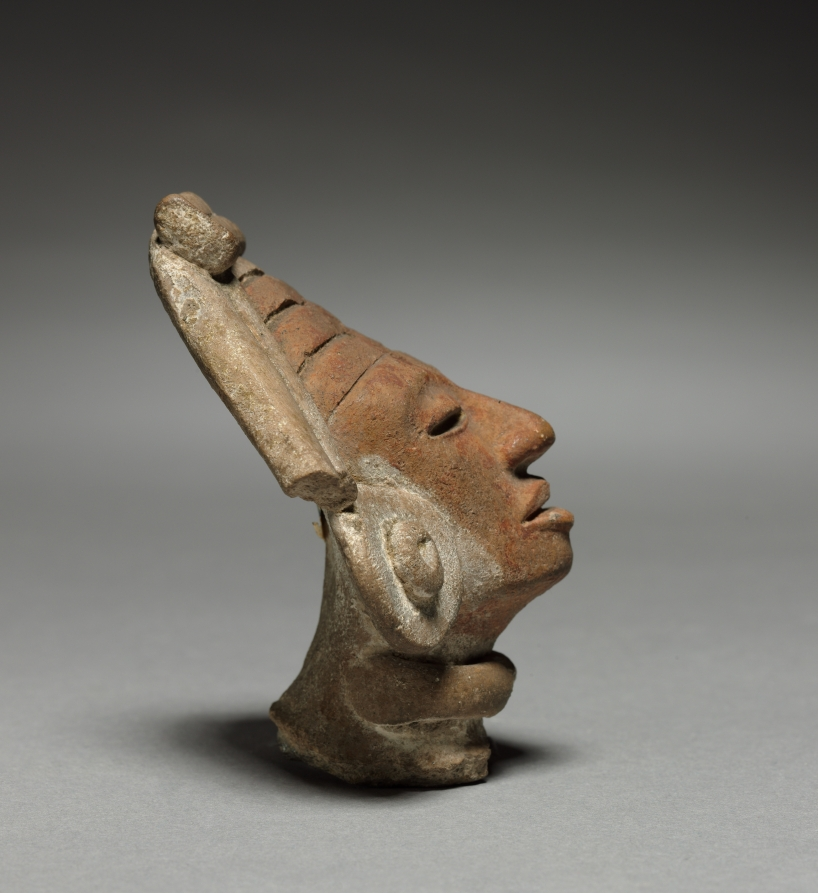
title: Figurine Head Fragment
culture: Central Mexico, Teotihuacán, Classic period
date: 150–350 CE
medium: ceramic, pigment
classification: Ceramic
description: The earliest Teotihuacan figurines are hand modeled, while later specimens were produced with molds. This exceptionally large example has a mold-made head, with facial features carefully retouched by hand. Earthenware figurines were made in great abundance throughout Teotihuacan's history, and may have been used in household religious rituals.